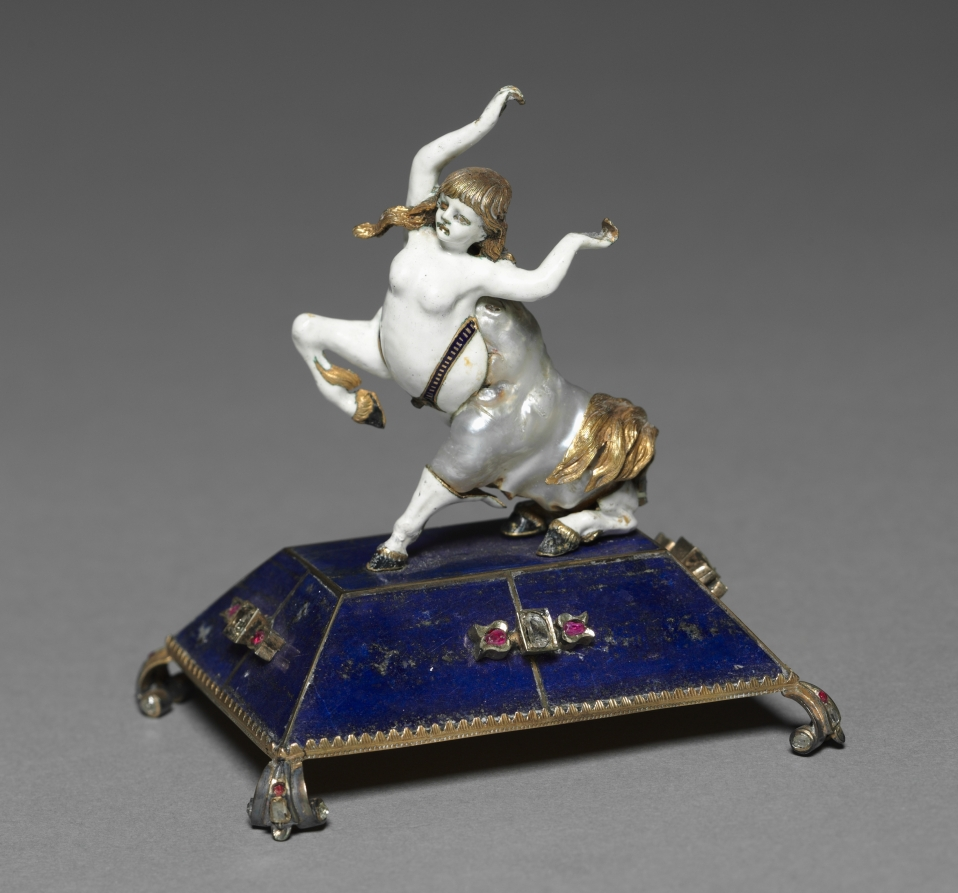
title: Female Centaur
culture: Austria, Vienna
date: late 1800s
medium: enamel, pearl, on lapis lazuli stand set with diamonds and rubies mounted in silver gilt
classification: Miscellaneous